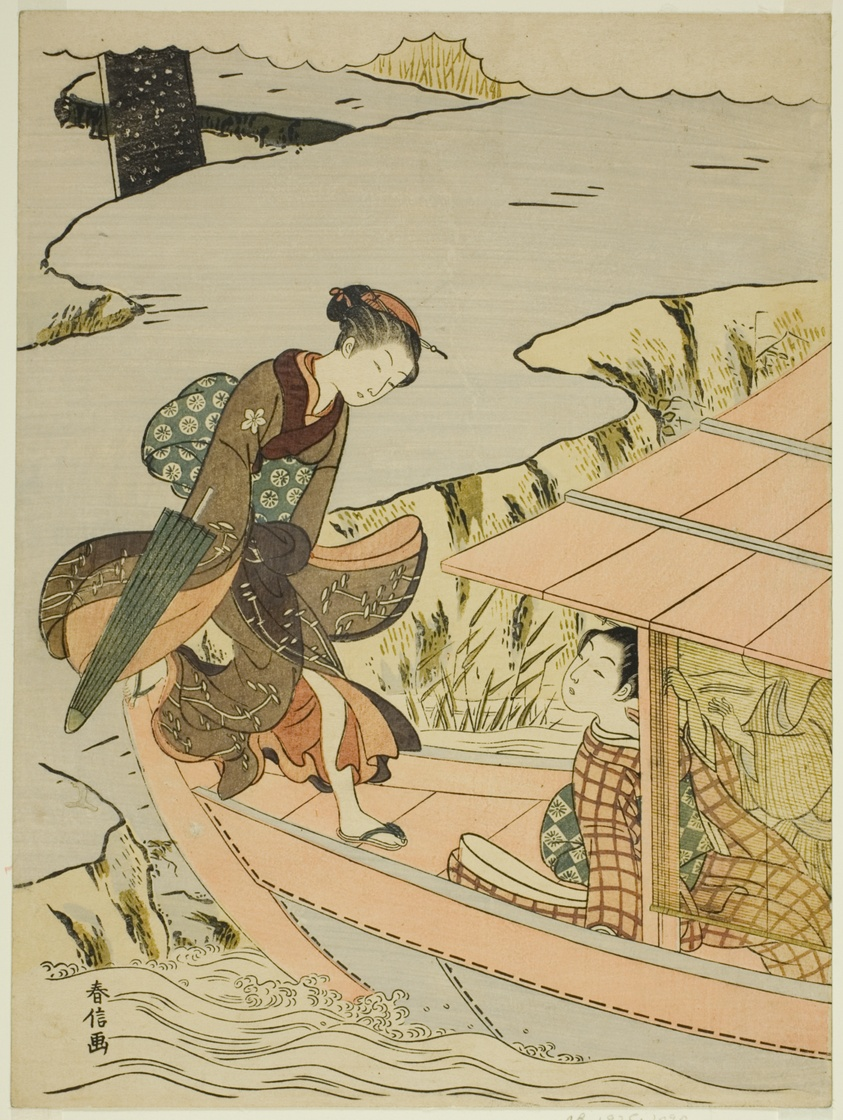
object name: Print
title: Girl Boarding a Boat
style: Japanese (culture or style)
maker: Suzuki Harunobu 鈴木 春信; Japanese, 1725 (?)-1770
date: c. 1767/68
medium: Color woodblock print; chuban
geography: Japan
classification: woodblock print; print; asian art